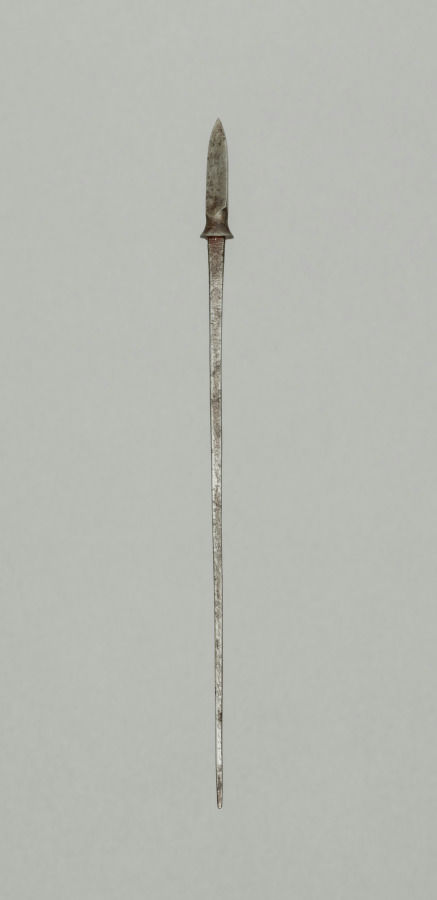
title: Arrow Point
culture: Japan, Edo period (1615–1868)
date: 1600s-1700s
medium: steel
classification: Arms and Armor